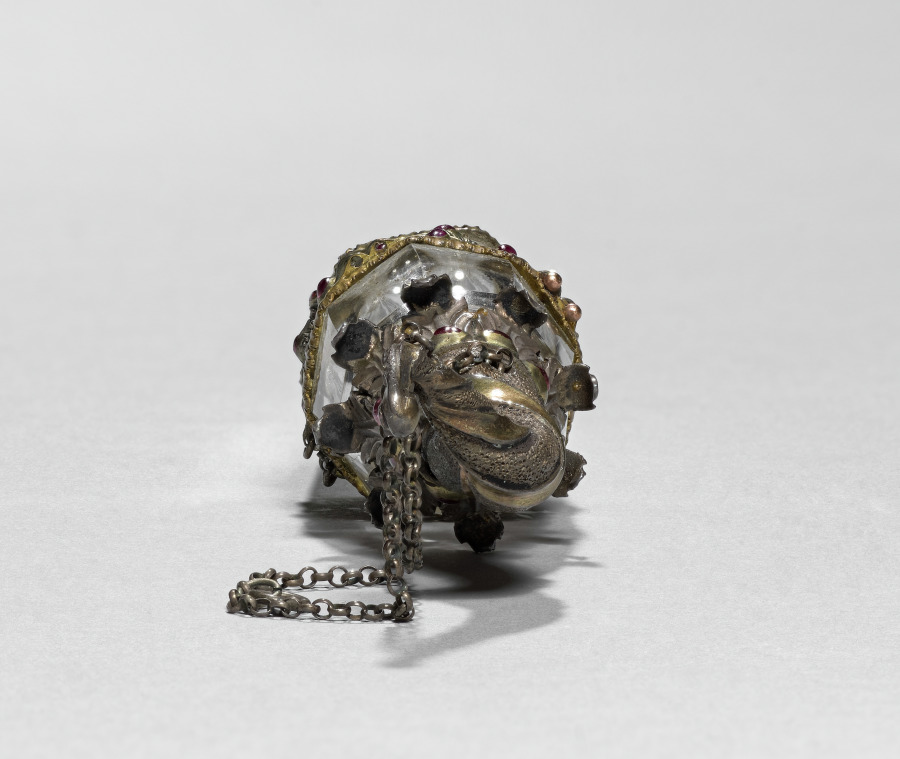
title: Scent Bottle (Vinaigrette)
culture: France, 19th century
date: 1800s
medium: glass mounted in silver (?) partially gilt and set with pink cabochon stones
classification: Miscellaneous